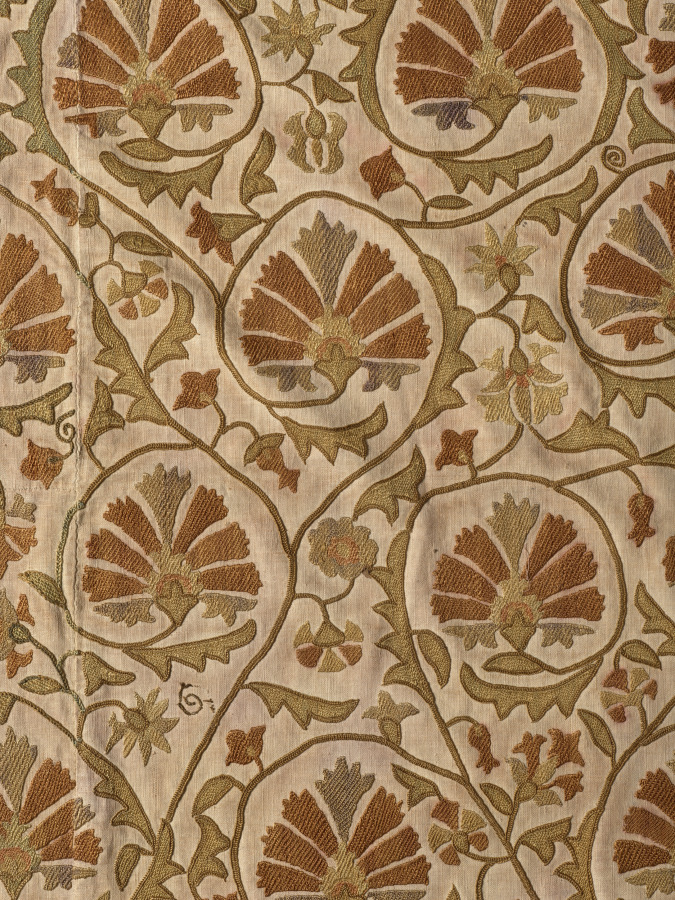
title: Embroidered Cover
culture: Uzbekistan, Bukhara, 19th century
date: 19th century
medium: embroidery: silk on cotton tabby ground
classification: Embroidery